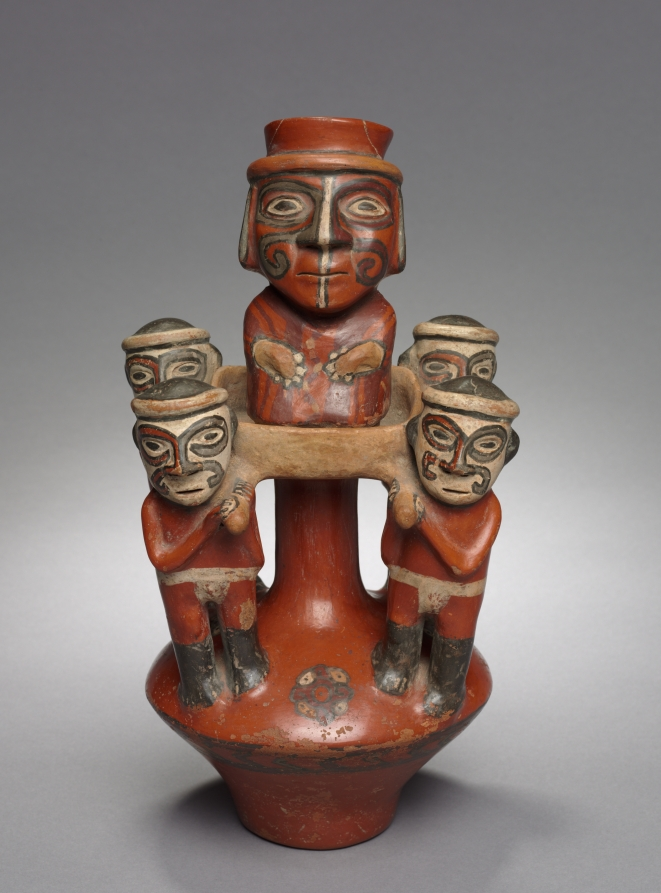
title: Vessel with Litter Group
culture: Central Andes, central highlands, reportedly Wari Wilka, Wari style, 6th-10th century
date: 600–1000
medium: ceramic and slip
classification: Ceramic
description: The sculptural scene atop this vessel's chamber depicts four porters who carry a dignitary in a litter, a high-status mode of transport. Reportedly found at Wari Wilka, a highland water shrine, the vessel empties via a long channel that passes through the body of the dignitary.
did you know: Litters were a mode of transportation reserved for people of high social status.